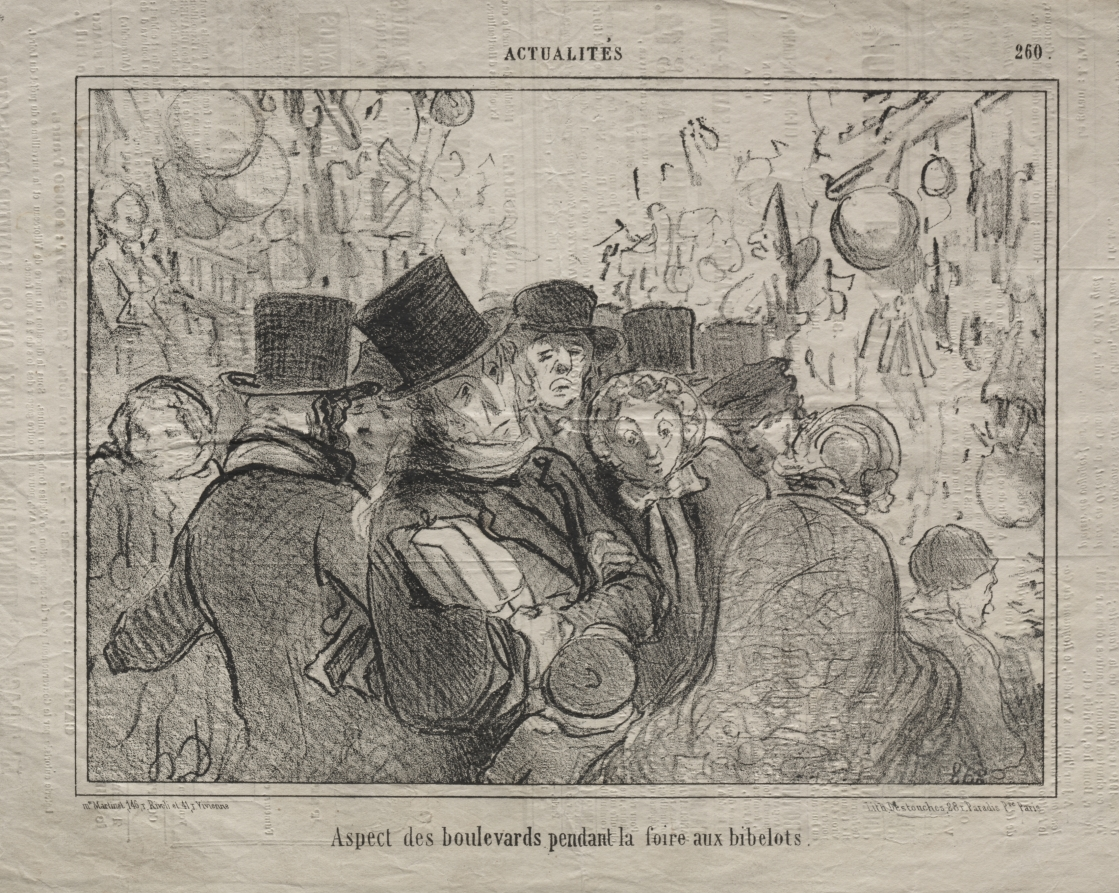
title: View of boulevards during a market for trinkets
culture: France, 19th century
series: News of the Day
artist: Honoré Daumier (French, 1808–1879)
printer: Destouches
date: 1856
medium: lithograph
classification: Print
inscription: Right margin, pencil: 2? / 7 ; Lower margin, pencil: good imp / 46.210 / Del. VIII. 2736, state II/II ; Lower margin, printed: mon. Martinet, 146, r. Rivoli et 41, r. Vivienne. / Lith. Destouches, 28 r. Paradis Pre. Paris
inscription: Above image, printed: ACTUALITÉS. / 260 ; Below image, printed: Aspect des boulevards pendant la foire aux bibelots.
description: This print was published in Le Charivari (January 7, 1856) as plate 260 from the series News of the Day.